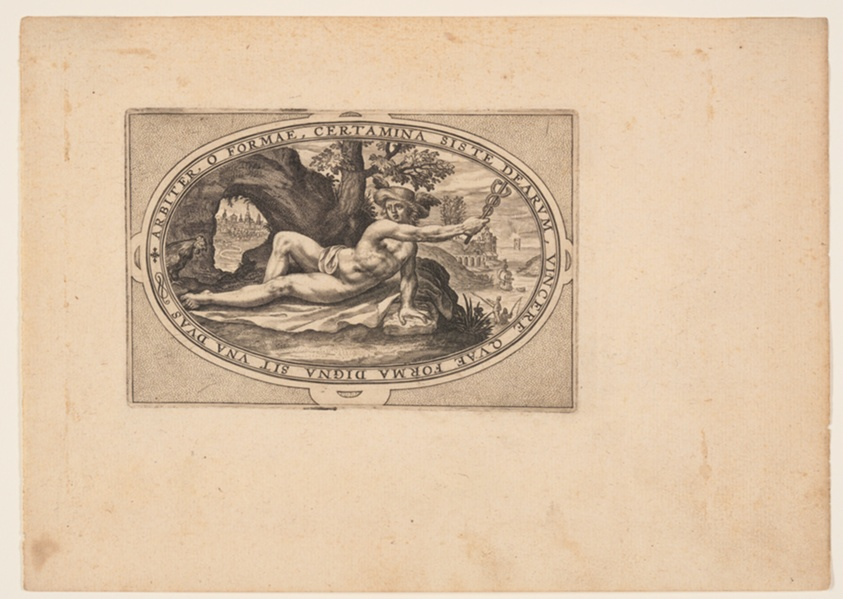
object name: Print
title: Mercury, from Gods and Goddesses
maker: Crispijn van de Passe I; Dutch, c. 1565–1637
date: 1592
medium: Engraving on paper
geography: Netherlands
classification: engraving; paper; print; prints and drawing